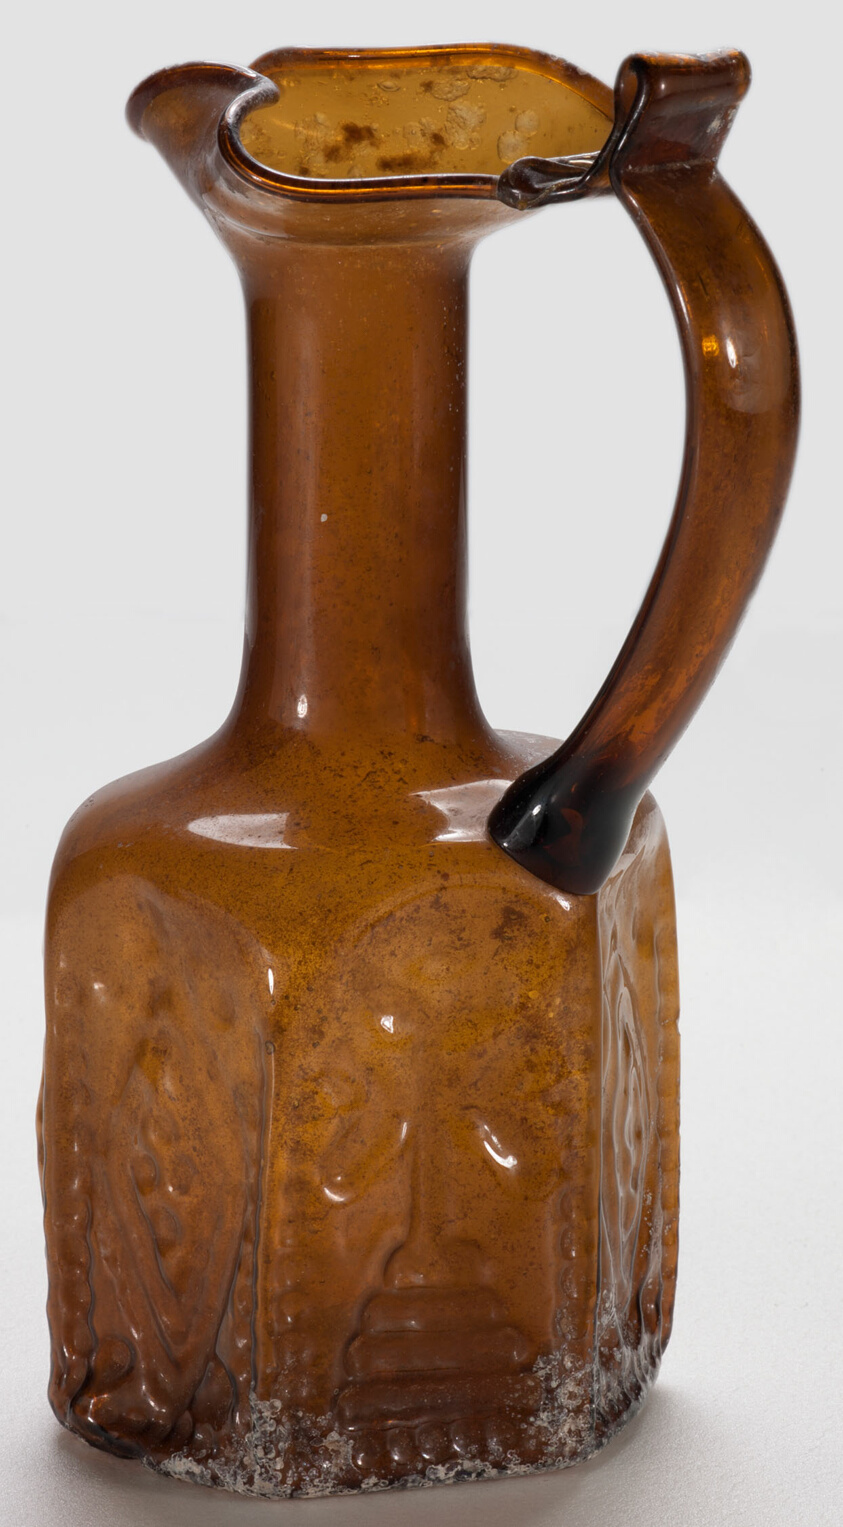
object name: Vessel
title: Pilgrimage Jug with Christian Symbols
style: imperial (roman), palestinian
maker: Byzantine; Jerusalem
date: 578–636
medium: Glass, mold-blown technique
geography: Latin Kingdom of Jerusalem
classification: vessel; glass; ancient art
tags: Christian subjects, containers